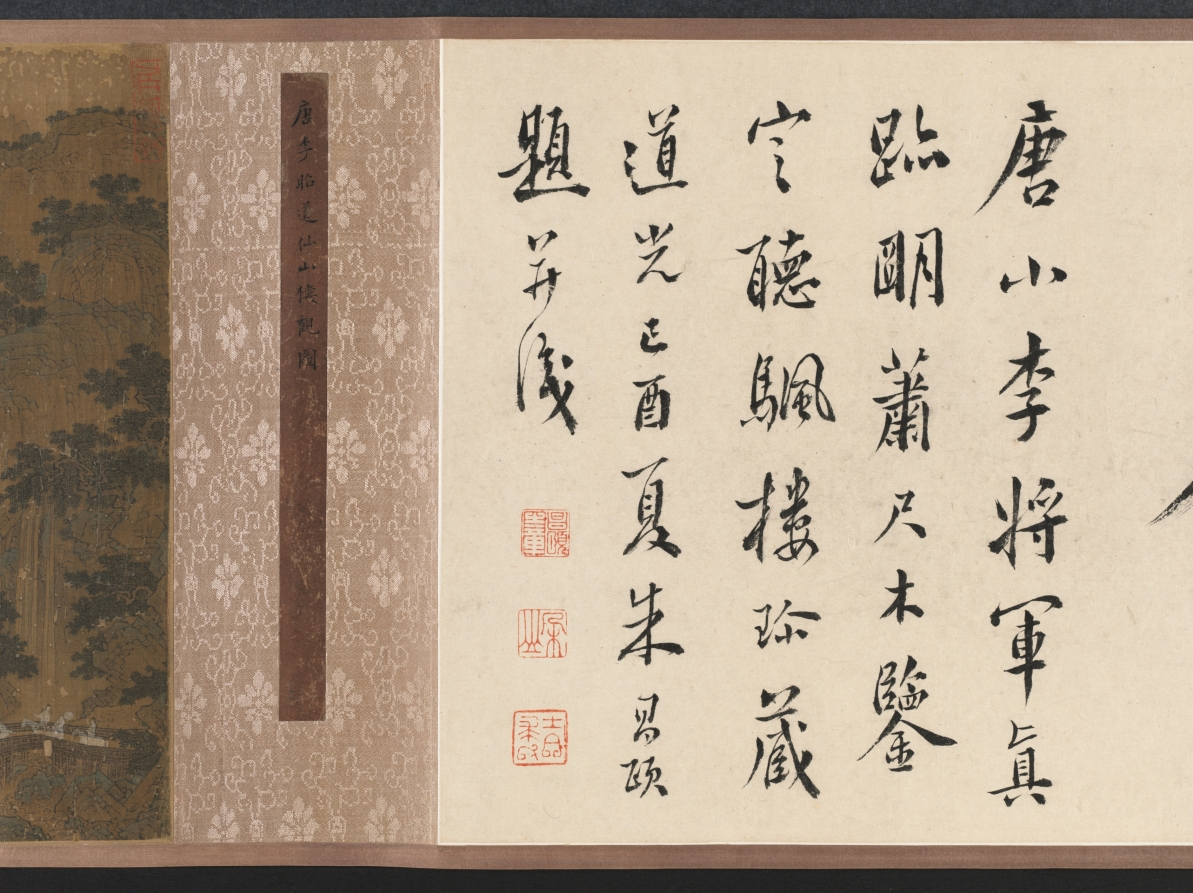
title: Waiting for the Moon in the Mid Autumn Festival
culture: China, Ming dynasty (1368–1644)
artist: Shi Rui (Chinese, c. 1400-c. 1470)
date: 1400s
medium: handscroll, ink, color, and gold on silk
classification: Painting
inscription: [印] 石氏以明; 游戯翰墨.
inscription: 僊山樓觀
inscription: 1 inscription, dated 1639, and 1 seal of Xiao Yuncong 蕭雲従 (1596-1673). Inscription by Xiao Yuncong: This is a painting by the Junior General Li. The painting is damaged and cracked at many places. Many of the paper strips for backing have been missing since long ago, but the colors are still fresh as if they had just been applied and the ink still looks moist. During the reign of Tianbao (742-756) of the Tang Dynasty, the Imperial Klansman Li Sixun was summoned to paint the walls of the Datong Hall. He was known as the "Senior General." His son, who came to be known as the "Junior General," was named Zhaodao. Of the stone epitaph [Li Sixun bei, or the "epitaph of Li Sixun," one of the best known calligraphic monuments of the Tang Dynasty], engraved with the calligraphy of Li Beihai 李北海 [Li Yong 李邕, 678-747], more than half has fallen off. Why, in contrast, was this painting able to survive? Or could it be that despite the fact that the stone is hard and the silk is soft, their preservation or destruction depends on some other factors? Moreover, since they were titled nobility of imperial descent, it is doubtful that they had the leisure and the mood to indulge in such decorative and descriptive blue and gold painting for the mere amusement of their fellow men. Recently, I read the Yi zhou ming hua lu 益州名畫錄 [by Huang Xiufu 黃休復, preface 1005]. I found a certain Li Chin-nu who compared himself with Li Zhaodao 李昭道 and was called by the Sichuan people the Junior General Li. In a painting which he did, entitled Mt. Ch'ing-ch'eng, the architectural structure of the pavilions, terraces, bridges, and boats are meticulous and accurate. The horsemen on a spring outing are as small as grain and the wild geese among the clouds as tiny as dust. It was also said that he painted on silk of any length in accordance to specific commissions. Is it possible that this painting is one of his? Since that time 700 years have passed. Yet one of the two Junior General Li's must be our painter. Formerly, there were the so-called "Four Excellents" in the Hall of Portraits of the Buddhist monk Wu-ta Kuo-shih: the [portrait] painting by Ch'ang Ts'an [act. ca. 881-888}, the calligraphy by Priest Tao-ying, the eulogy by Li Shangyin 李商隱 [813-858], and the landscape by Li Sheng [act. ca. 908-925]. This Li Sheng was styled Chin-nu and was also called Junior General Li. In the tenth month of the Chi-mao year, the twelfth year of the Chongzhen era [1639], recorded by Xiao Yuncong of Wuhu. trans. WKH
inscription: 4 colophons and 30 additional seals: 1 seal of Xu Qianxue 徐乾學 (1631-1694); 1 seal of Li Chien 黎簡 (1747-1799); 1 seal of Chang Chin-fang (18th c.); 2 seals of Sun Erzhun 孫爾準 (1770–1832); 1 colophon and 2 seals of Zhang Weiping 張維屛 (1780-1859); 1 seal of Wu Rongguang 吳榮光 (1773-1843); 1 colophon and 2 seals of Luo Tianchi 羅天池 (1826 jinshi); 7 seals of Wu Yanhui 伍元蕙 (active 1821–1851); 2 colophons and 4 seals of Pan Zhengwei 潘正煒 (1791-1850); 9 seals unidentified.